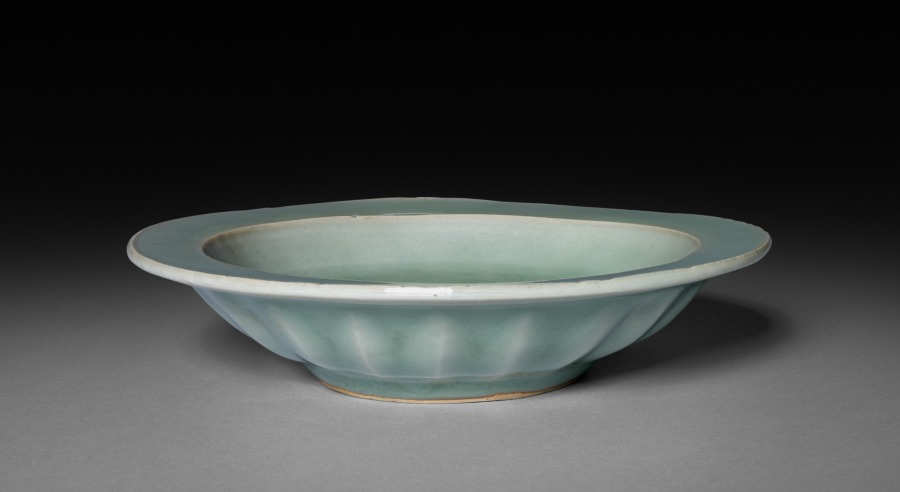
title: Dish with Two Fish in Relief: Longquan Ware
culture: China, Zhejiang province, Yuan dynasty (1271-1368)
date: early 14th Century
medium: glazed porcelain with unglazed molded decoration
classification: Ceramic